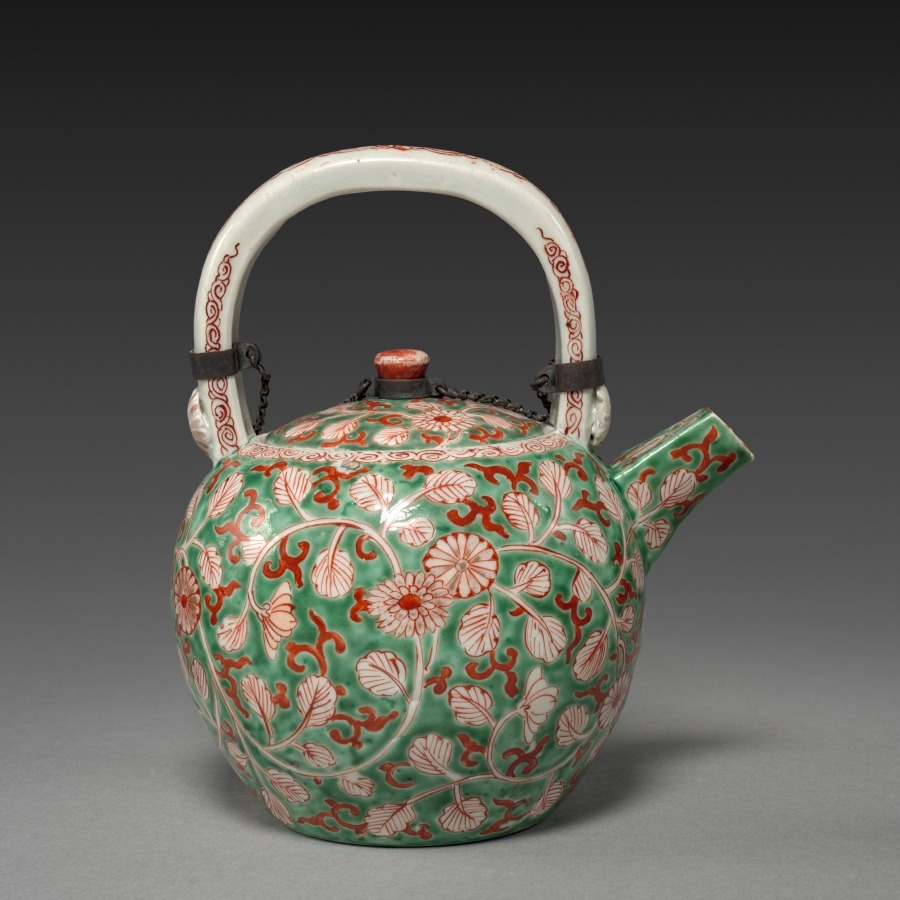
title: Wine Pot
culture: Japan, Edo period (1615–1868)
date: 1615–1868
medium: porcelain with colored enamel decoration (Hizen ware, Arita type)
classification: Ceramic